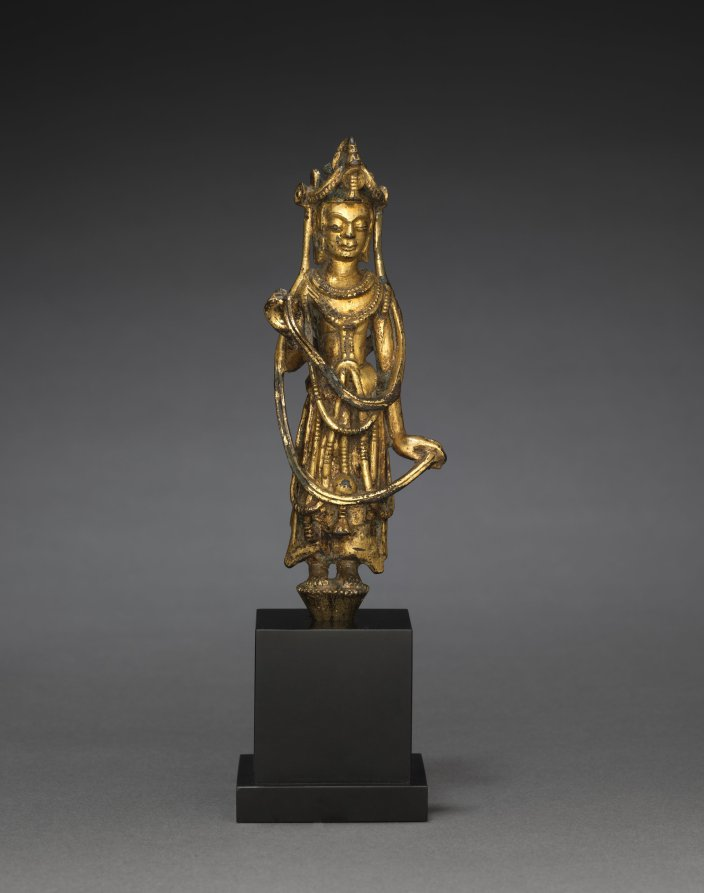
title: Standing Bodhisattva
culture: China, Sui dynasty (581-618)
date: late 500s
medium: gilt bronze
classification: Sculpture